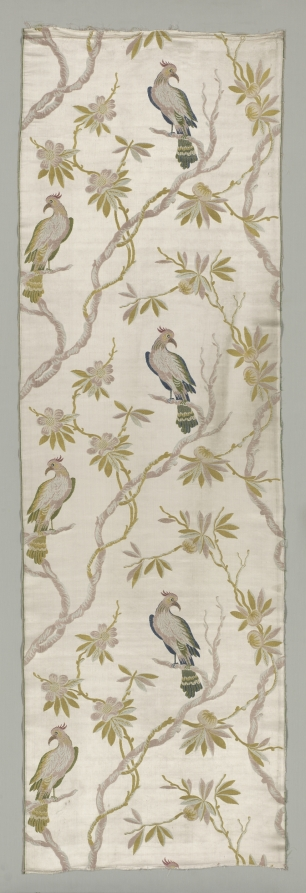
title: Cockatoos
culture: France, late 18th - early 19th century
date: late 1700s - early 1800s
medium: brocade and weft-patterned weave with complementary wefts; silk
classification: Textile